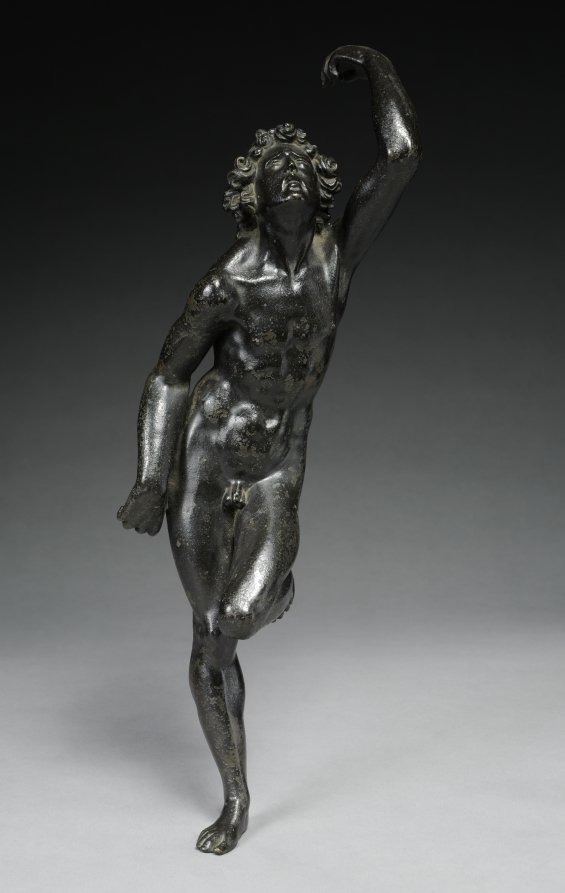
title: Saint Sebastian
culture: Germany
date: 1600s or later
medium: bronze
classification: Sculpture